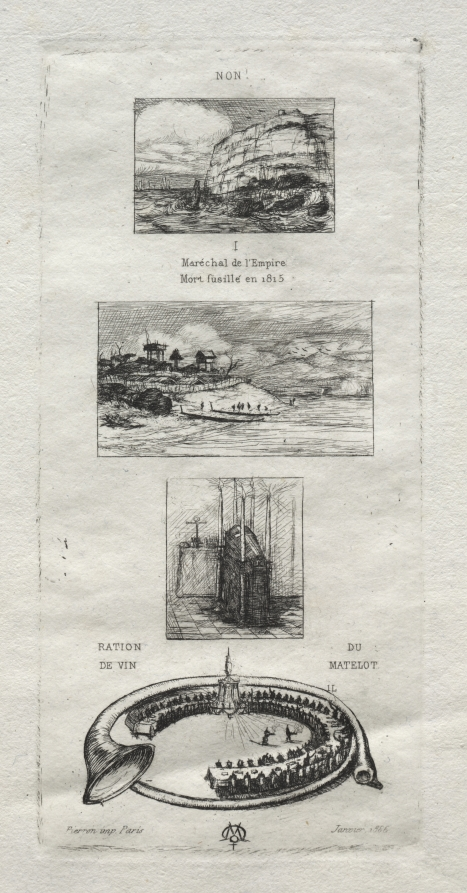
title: Rebus: "No, Morny is not dead for he is marrying again"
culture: France, 19th century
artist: Charles Meryon (French, 1821–1868)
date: 1866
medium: etching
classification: Print